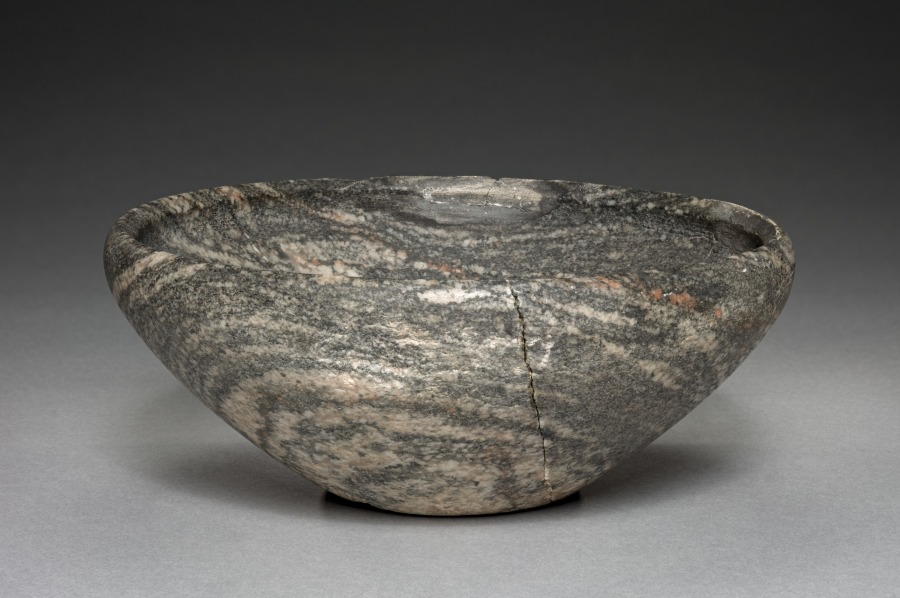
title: Bowl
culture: Egypt, Early Dynastic (2950–2647 BCE), Dynasty 2, reign of Nynetjer (c. 2700 BCE) or later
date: 2770–2647 BCE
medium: anorthosite gneiss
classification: Vessels